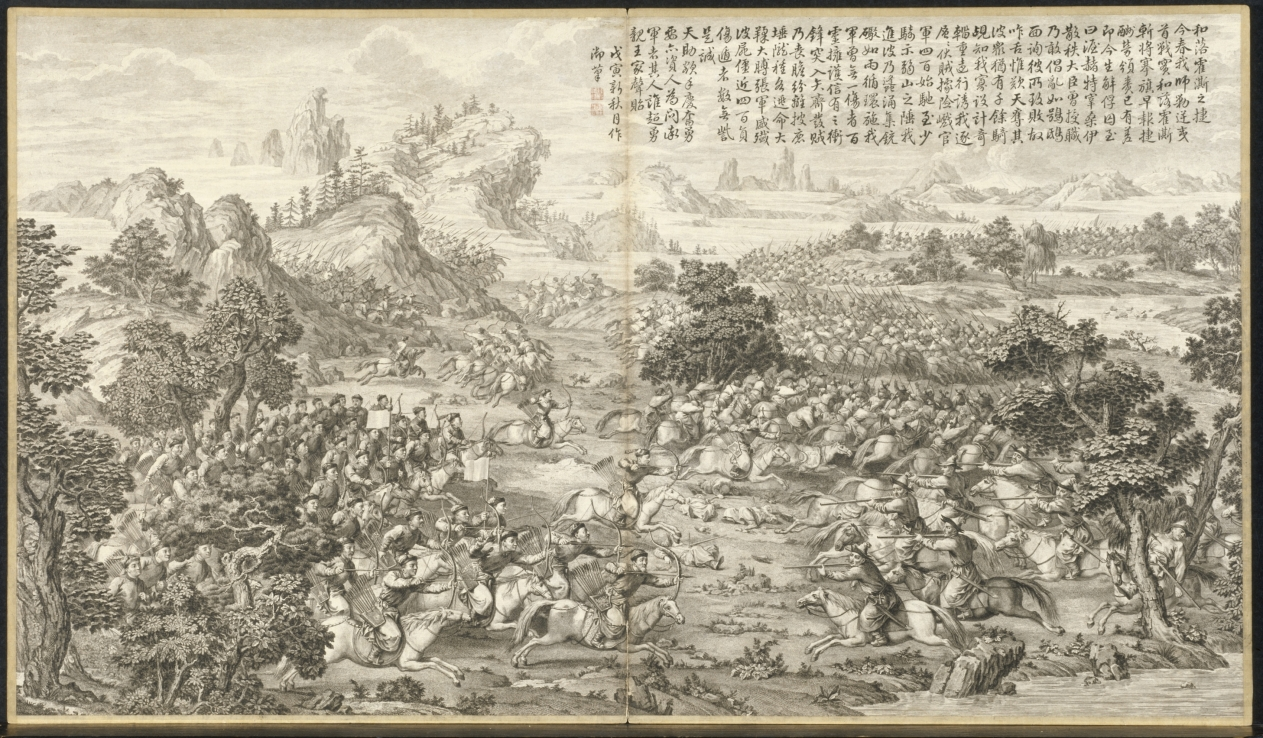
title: Victory at Heluo Heshi: from Battle Scenes of the Quelling of Rebellions in the Western Regions, with Imperial Poems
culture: China, Qing dynasty (1644–1911), Qianlong reign (1736–95)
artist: Jean Denis Attiret (French, 1702–1768)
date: c. 1765–74; poem dated 1758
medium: etching, mounted in album form, 16 leaves plus two additional leaves of inscriptions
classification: Print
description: This set of etchings was commissioned by Emperor Qianlong to record in pictorial terms the courage of his generals and soldiers in quelling the rebellions in the Western Regions. Qianlong added his own poem to each of the etchings, indicating his appreciation and pride in this demonstration of military might. "Western Regions" refers to the present-day Xingjiang province, often described in Western writing as "Central Asia."